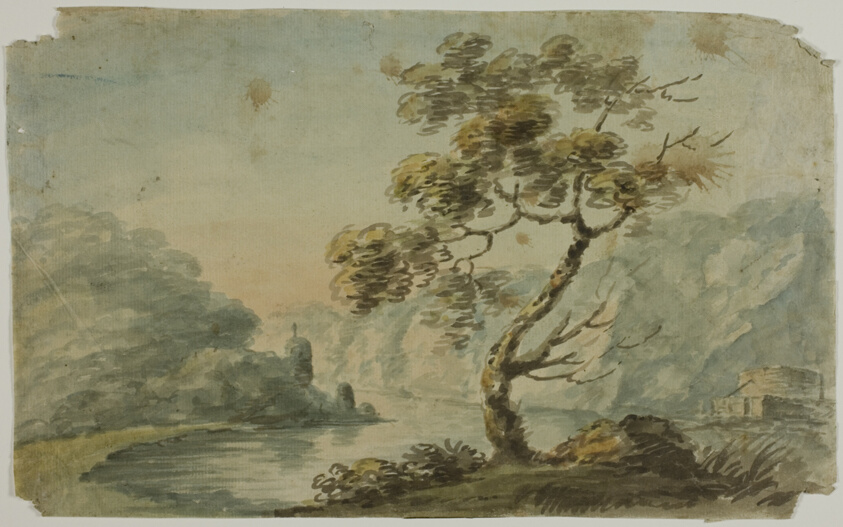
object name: Drawing and Watercolor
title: Windswept Landscape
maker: Possibly attributed to Nicholas Pocock (English, 1740-1821); or Richard Wilson (English, 1714-1782)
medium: Watercolor on cream laid paper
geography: England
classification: watercolor; drawings (visual works); prints and drawing